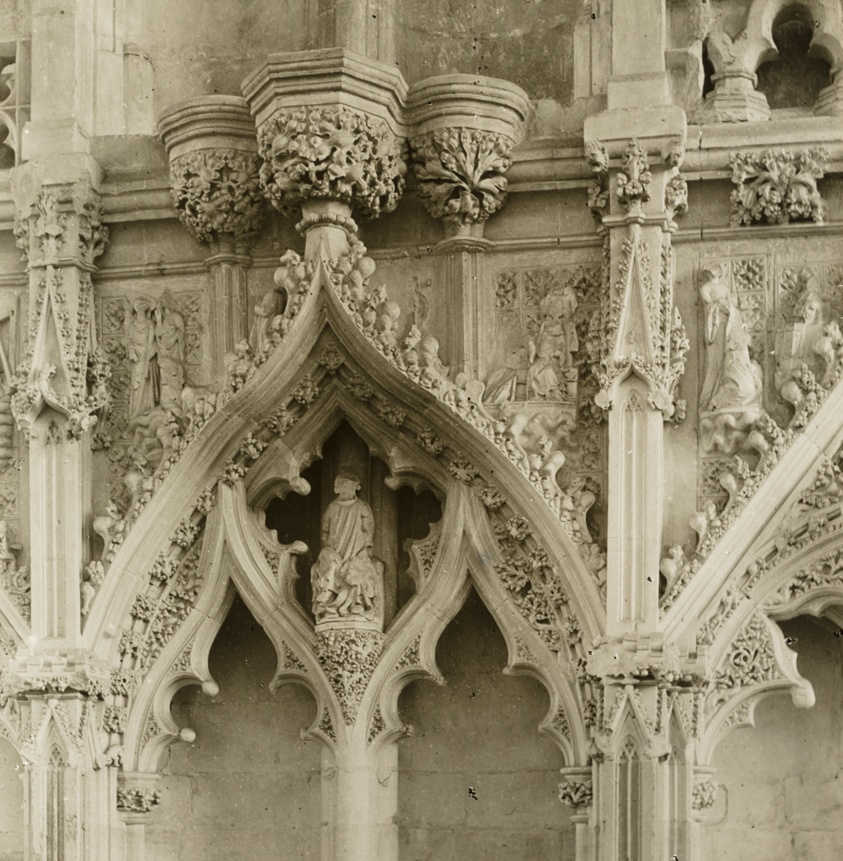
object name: Photograph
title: Ely Cathedral: Lady Chapel, details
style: Pictorialism, 19th century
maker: Frederick H. Evans (English, 1853–1943)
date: c. 1891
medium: Lantern slide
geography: England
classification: photograph; photography